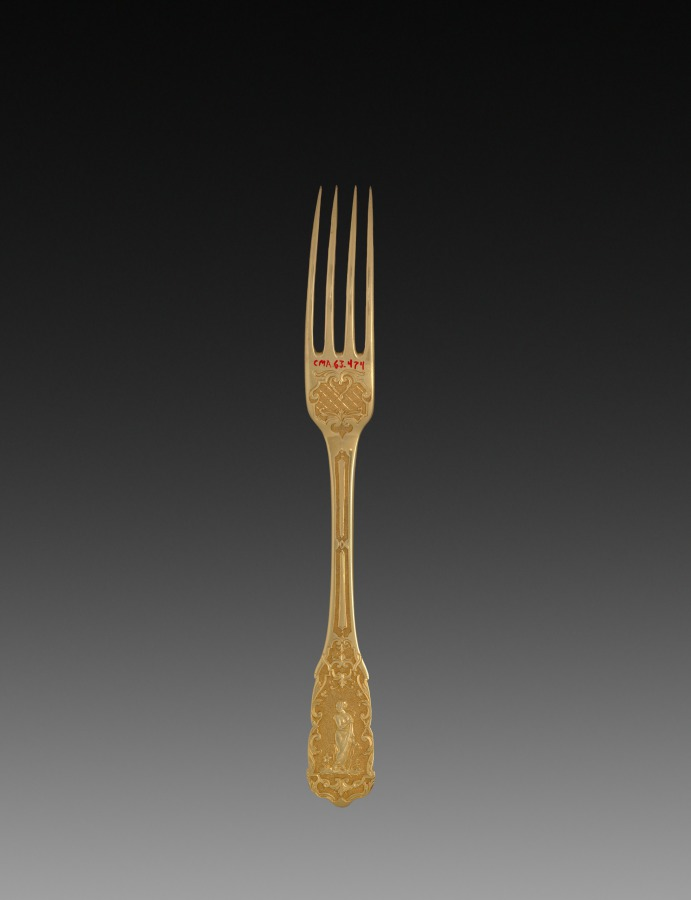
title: Fork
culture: Germany, Augsburg(?), 18th century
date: c. 1725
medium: gold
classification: Metalwork